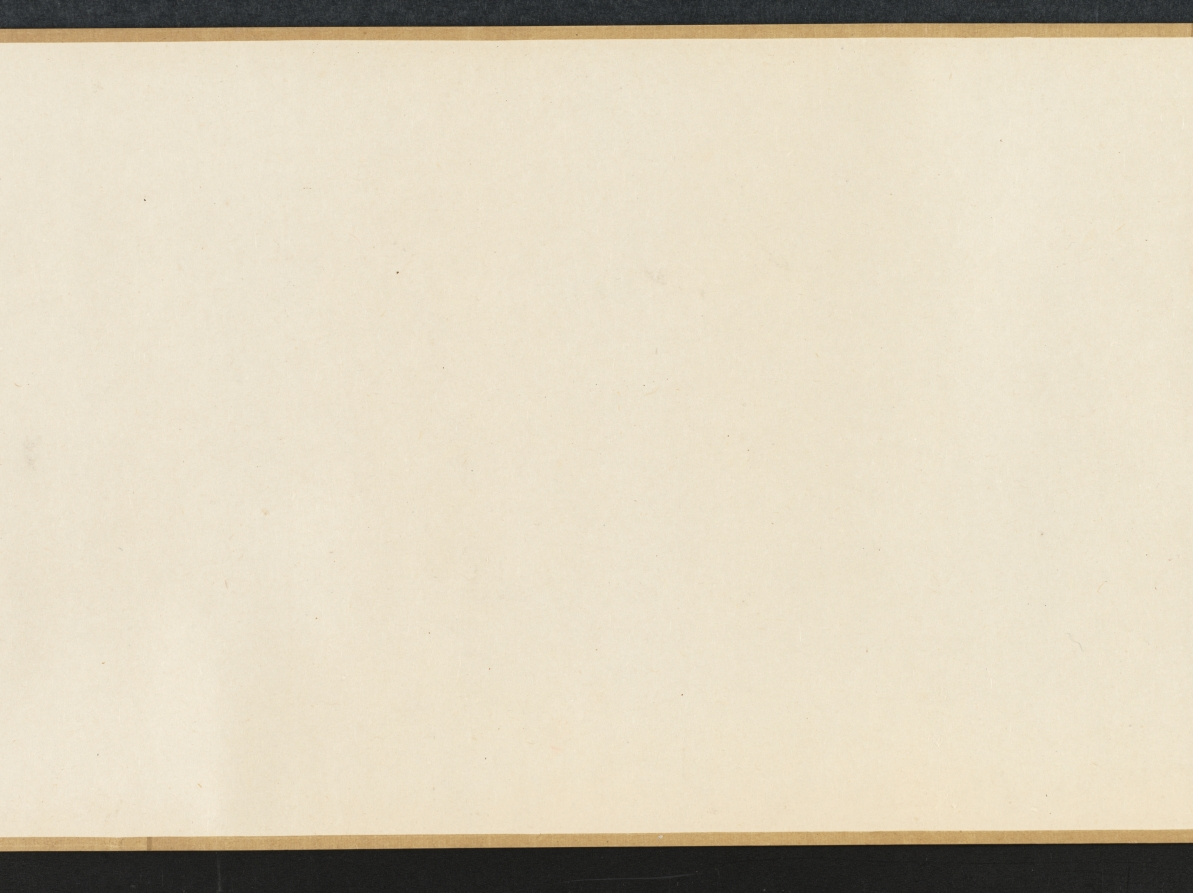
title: The Lantern Night Excursion of Zhong Kui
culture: China, Yuan dynasty (1271-1368)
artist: Yan Hui (Chinese, active 1270–1310)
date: late 1200s–early 1300s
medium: handscroll; ink and slight color on silk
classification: Painting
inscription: Artist's signature [and probable seal]: Yan Qiuyue 顏秋月 Title on frontispiece and 1 seal of Niu Shuyu 鈕樹玉 (1760–1827): Qiuyue mohuan 秋月墨幻 [Qiuyue's Ink Fantasy]. 31 additional seals: 2 of Yang Shiqi 楊士奇 (1365–1444); 2 of An Guo 安國 (1481–1534); 8 of Xiang Yuanbian 項元汴 (1525–1590); 2 of Geng Zhaozhong 耿昭忠 (1640–1686); 4 of Pu Tung 溥侗 (1870–1952); 7 of Tan Jing 譚敬 (1911–1991); 1 of Liu Ting-chih (20th c.); 5 unidentified.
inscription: An inscription by Zizhi Shanren 紫芝山人 [probably Jiang Hui 蔣惠], dated 1389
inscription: An inscription by Wu Kuan 吳寬 (1436–1504)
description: Here, the demon queller Zhong Kui leads a nightly procession of street entertainers with bare, muscular bodies and demonic faces. Some wear shabby clothes, and all perform stunts and tricks to astound and scare the viewer. In fact, a New Year custom in cities of southeast China had the poor, disguised as demons, process through the streets and play their tricks to clear households of evil spirits and welcome the spring. From right to left, a demonic figure leads the procession and beats a drum; another lifts a large rock; one stands on his hands trying to drink; one balances a jar on his elbow; three hold and wield weapons; one carries a folded chair covered by a cow’s skin; another holds Zhong Kui’s qin (zither), books, brush, and inkstone. At the end of the scroll, two figures offer a cup and bottle of wine to Zhong Kui, who lifts his hand in command.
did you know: Zhong Kui was an ancient ghostbuster.